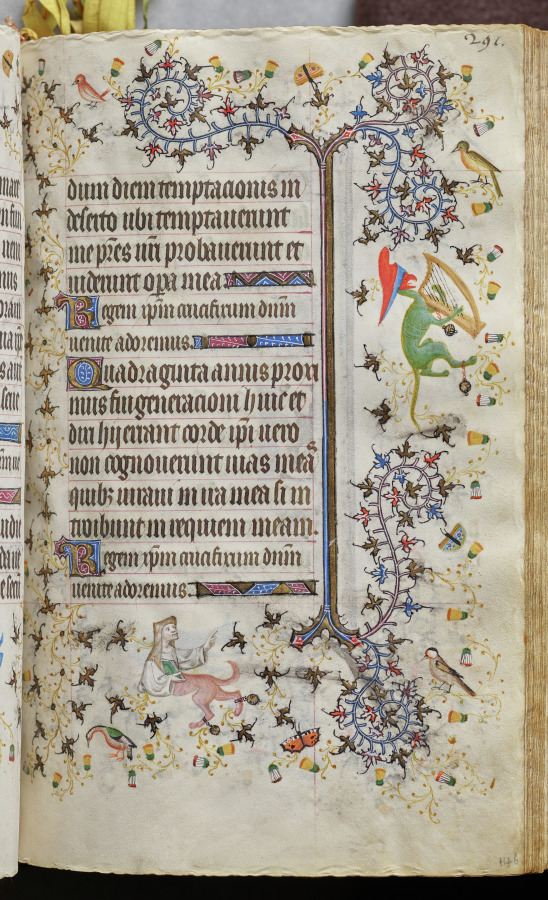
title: Hours of Charles the Noble, King of Navarre (1361-1425): fol. 146r, Text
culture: France, Paris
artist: Master of the Brussels Initials and Associates (French)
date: c. 1405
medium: ink, tempera, and gold on vellum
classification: Bound Volume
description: This precious volume was obviously highly prized by its owner, the French-born King of Navarre, who had his coat of arms painted on no less than twenty folios. Rather than directly commissioning this manuscript from a specific workshop, it seems that Charles the Noble acquired his book of hours -- perhaps ready-made for the luxury market -- while on a trip to Paris in 1404-05. A collaborative effort, six painting styles are evidenced within the pages of this codex, those of two Italians, two Frenchmen, and two Netherlanders. The painter who was responsible for the planning and decoration of the book, and who produced seventeen of the large miniatures, was a Bolognese artist known as the Master of the Brussels Initials. His principal assistant, responsible for most of the borders, was a Florentine who signed his name "Zecho" da Firenze on folio 208 verso.